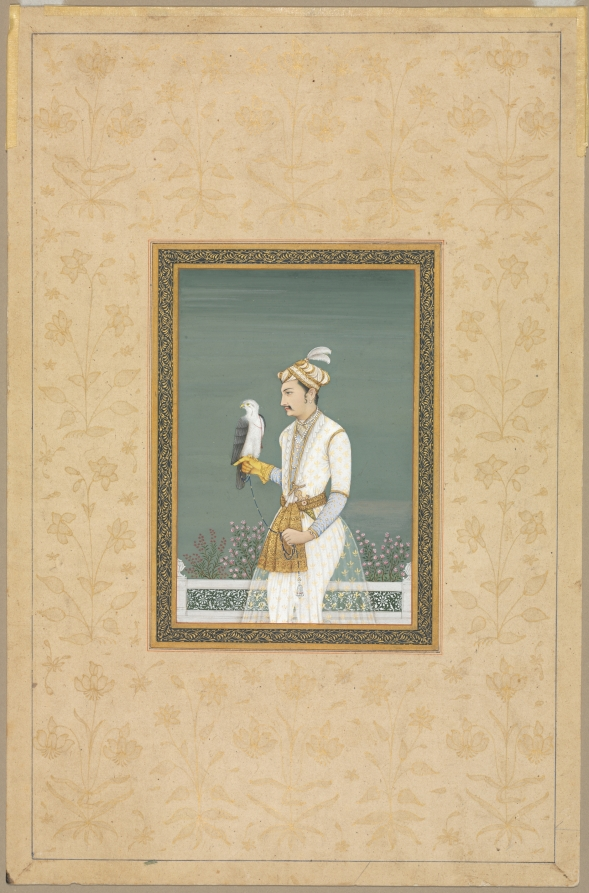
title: Portrait of a Prince with a Hawk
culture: India, Mughal, 18th century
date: 1700s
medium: Gum tempera and gold on paper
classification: Painting